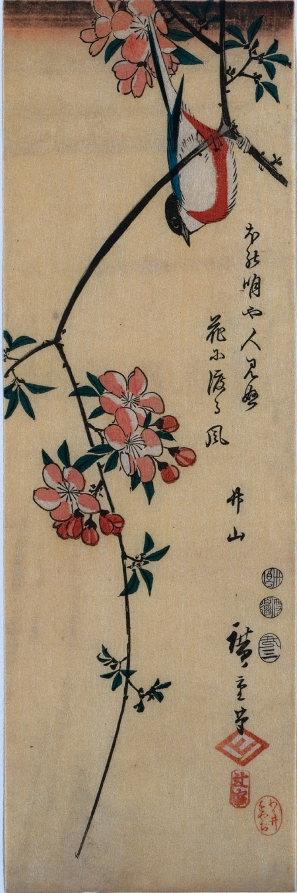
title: Sudden Shower over Shin-Ōhashi Bridge and Atake, from the series One Hundred Famous Views of Edo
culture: Japan, Edo period (1615–1868)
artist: Utagawa Hiroshige (Japanese, 1797–1858)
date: 1857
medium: Color woodblock print, ink and color on paper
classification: Print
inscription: Signature: Hiroshige Hitsu Artist Seal: Hiro Publisher: Tsujiyasu (Tsujian) Censorship Seal: Mera, Watanabe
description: Running through Edo, the Ohashi Bridge was one of 300 bridges that crossed the Sumida River. Published about a year before Hiroshige’s death, this print design illustrates the artist’s mastery of capturing atmospheric conditions. Figures scurry across the bridge amid slanting sheets of rain.